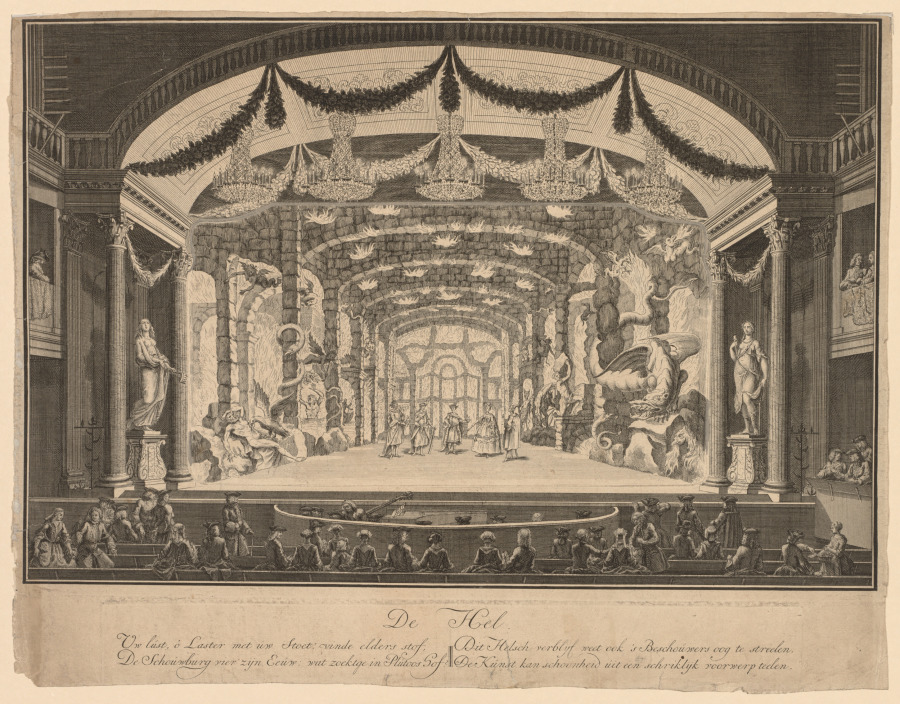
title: Inferno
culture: Netherlands(?), 18th century (?)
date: 1700s(?)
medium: etching (2 plates, one in center with main subject, the second frames the first, plus inscription plate)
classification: Print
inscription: across botton, in separate plate: De Hel. / Uw lúst, ô Laster met úw Stoet! vinde elders stof, ; De Schoúwburg vier' zÿn, Eeúw: wat zoektge in Plútoos Gof? / Dit Helsch verblÿf weet ook 's Beschoúwers oog te streelen. / De Kúnst kan schoonheid úit een schriklÿk voorwerp teelen.